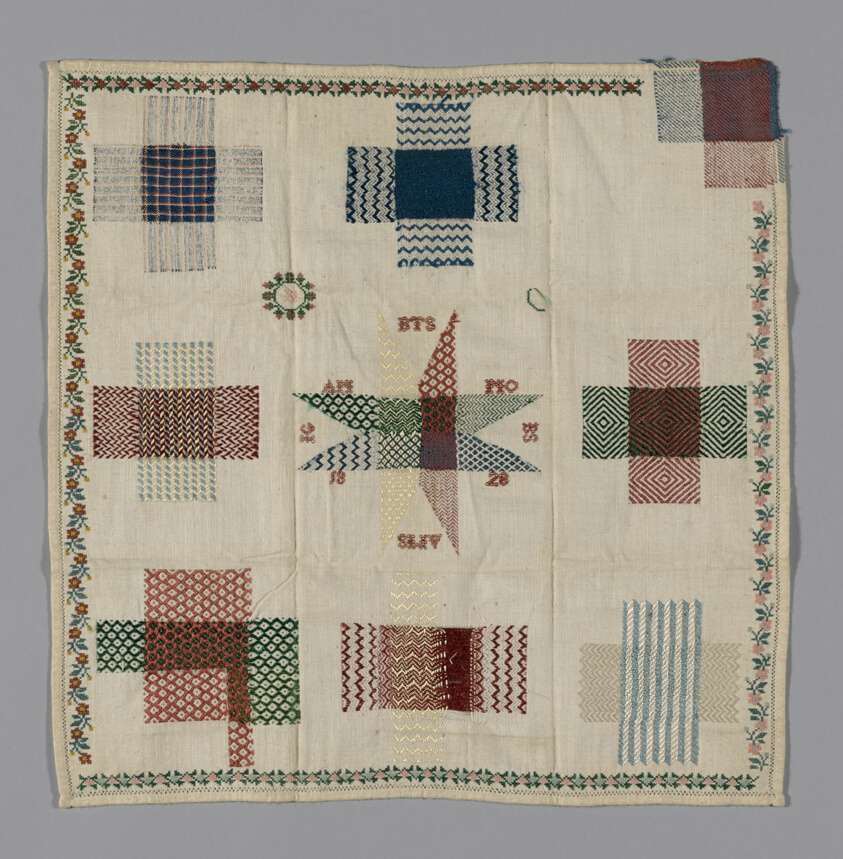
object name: Textile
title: Sampler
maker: Europe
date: 1828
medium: Cotton, plain weave; examples of darning in polychrome, embroidered around outer edges in silk and in cross stitch with tiny border of punched work held in place by cotton thread stitches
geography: Europe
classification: textile; needlework (visual works); sampler